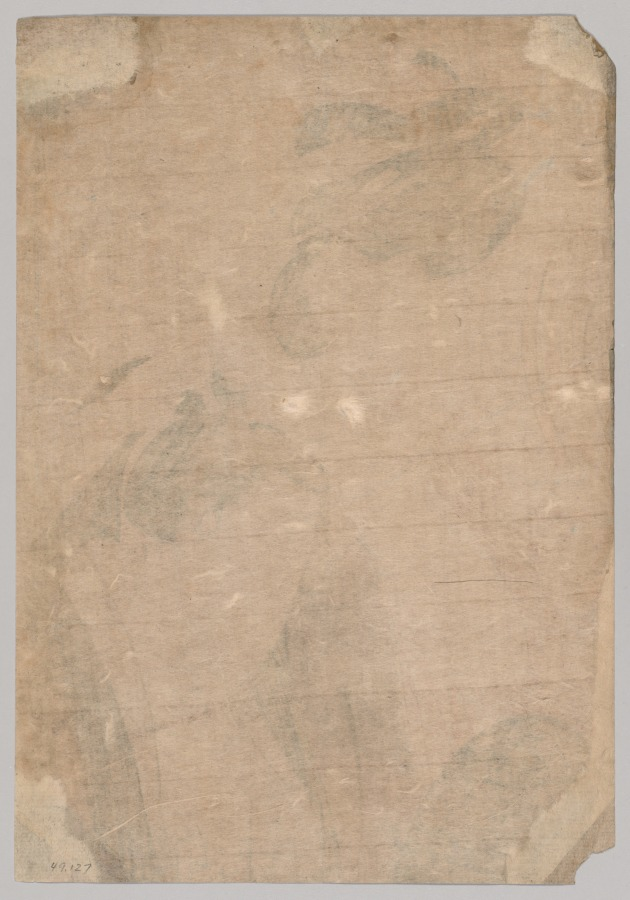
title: No Title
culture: Japan, Edo period (1615–1868)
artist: Kitagawa Utamaro (Japanese, c. 1754–1806)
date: 1753–1806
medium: color woodblock print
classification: Print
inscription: Signature: Utamaro fude